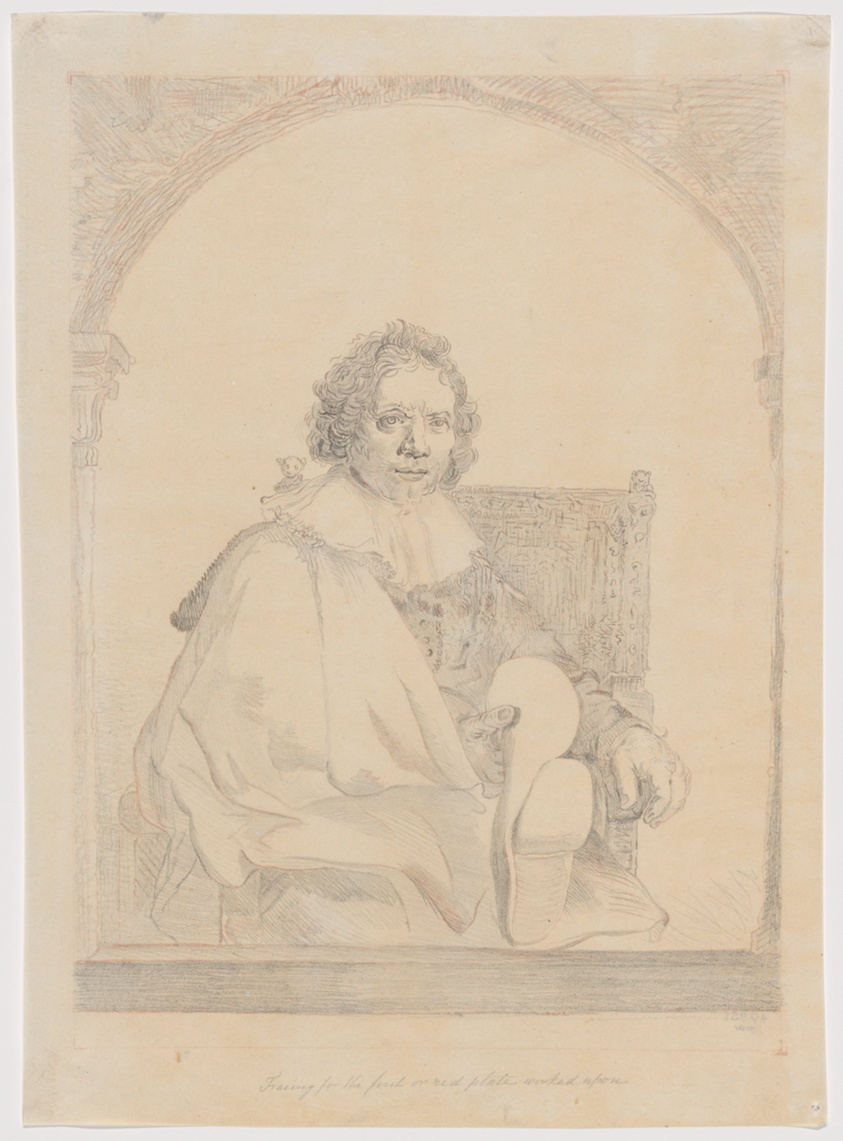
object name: Drawing and Watercolor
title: Study for Portrait of a Man in an Armchair, from Collection d'imitations de Dessins d'après les Principaux Maîtres Hollandais et Flamands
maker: Christian Josi (Dutch, died 1828); after Rembrandt van Rijn (Dutch, 1606-1669)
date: 1826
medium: Graphite over red chalk on light weight tracing paper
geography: Netherlands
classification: graphite; drawings (visual works); prints and drawing